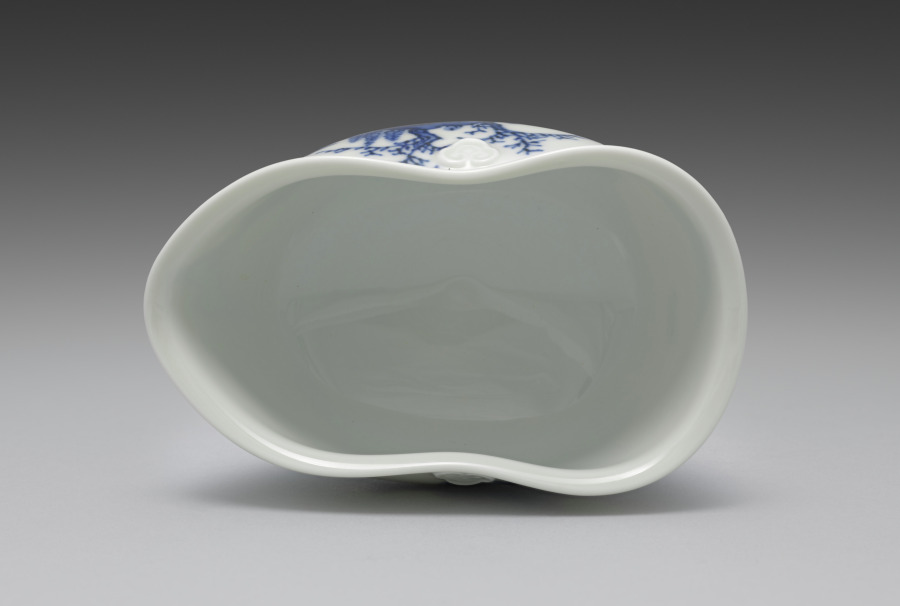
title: Water Cooler from Tea Set with Chinese Landscape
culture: Japan, Meiji period (1868–1912)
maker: Seifū Yohei III (Japanese, 1851–1914)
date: 1893–1914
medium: Porcelain with underglaze blue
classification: Ceramic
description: The kidney-shaped water cooler, yuzamashi, has a scene of a man gazing at a full moon in a dramatic mountain-scape stretching before a large compound in the woods. Another man, hunched over and carrying a heavy parcel tied to a pole over his shoulder, struggles to make his way up a hill to the site. The cooler also has a pair of applied nyoi staff-head forms for resting the tips of one’s thumb and index finger.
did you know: This is a yuzamashi, a container used to cool boiled water to just the right temperature for the best flavor when steeping.